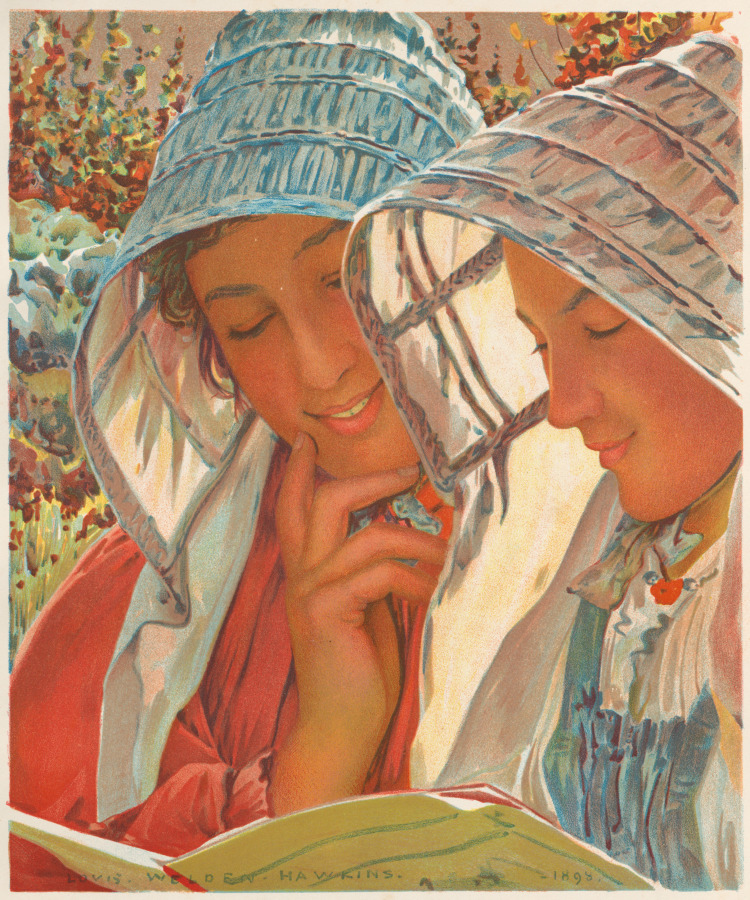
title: Readers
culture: France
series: L'Estampe Moderne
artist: Louis Welden Hawkins (French, 1849–1910)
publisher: Imprimerie Champenois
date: 1898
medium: Color lithograph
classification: Bound Volume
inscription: In plate: lower margin of image: LOUIS-WELDEN-HAWKINS- -1898.; lower right corner of sheet: blindstamp of l'Estampe Moderne (Lugt 2790)